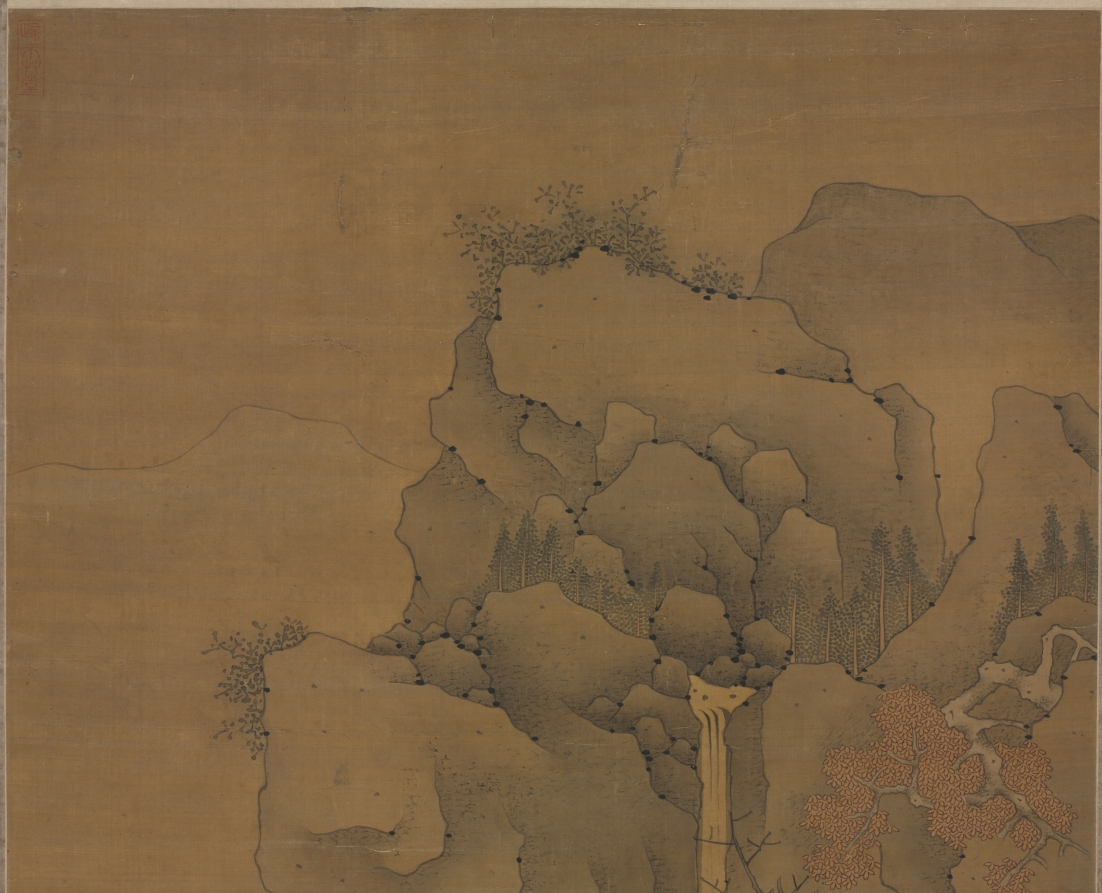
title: Xu Jingyang Moving His Family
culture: China, Ming dynasty (1368–1644)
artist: Cui Zizhong (Chinese, 1574–1644)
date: 1644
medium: Hanging scroll; ink and color on silk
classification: Painting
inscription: Artist's 2 seals: Pei-hai, Cui Zizhong yin.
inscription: 9 additional seals: 2 of Xiang Yuan (18th-19th c.); 1 of Tang Zuomei (late 18th-19th c.); 1 of Zhang Heng 張珩 (1915-1963); 1 of C. C. Wang 王季遷 (1907–2003); 4 unidentified.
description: Xu Jingyang was a dedicated fourth-century Confucian official who allegedly turned into a Daoist immortal. This scroll depicts the legend that when he attained immortality, he took his entire household, including chickens and dogs, to paradise. Cui Zizhong’s painting style intentionally referenced ancient masters. Typical of the pre-Song dynasty landscape tradition, there is the use of blue and green colors and an emphasis on outline rather than texture. While the trembling outlines are reminiscent of earlier painters, the flickering light on rocks and trees is a stylistic feature of Cui’s own time.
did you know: Xu Jingyang, wearing red, is in the upper register of figures, while below his servants transport a rooster, dog, and other supplies.